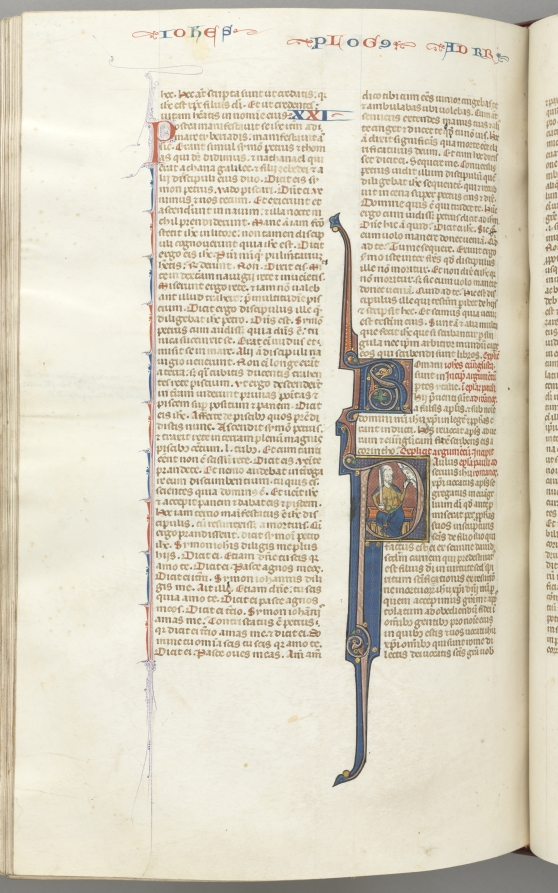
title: Fol. 435v, Romans, historiated initial P, Paul seated with a sword talking to the bust of God above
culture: Southern France, Toulouse(?), 13th century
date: c. 1275–1300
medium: ink, tempera and gold on vellum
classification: Bound Volume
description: Biblical manuscripts were highly prized and important possessions of churches, monasteries, cathedral schools, and universities throughout medieval Europe. The biblical texts were known as the vulgate, the translations made by Saint Jerome in the fourth century from Hebrew and Greek into Latin, which became the definitive and official Latin version of the Roman Church. In the 13th century, the bible was, for the first time, produced as a single volume with an officially sanctioned sequence to its books and chapters as illustrated by this example. The very extensive decoration of this bible is arranged hierarchically to indicate the relative importance of the various texts so that full or almost full-page initials mark the openings of the first prologue, Genesis, and the first Gospel; historiated initials mark the beginning of each book and illuminated initials mark the Prologues.